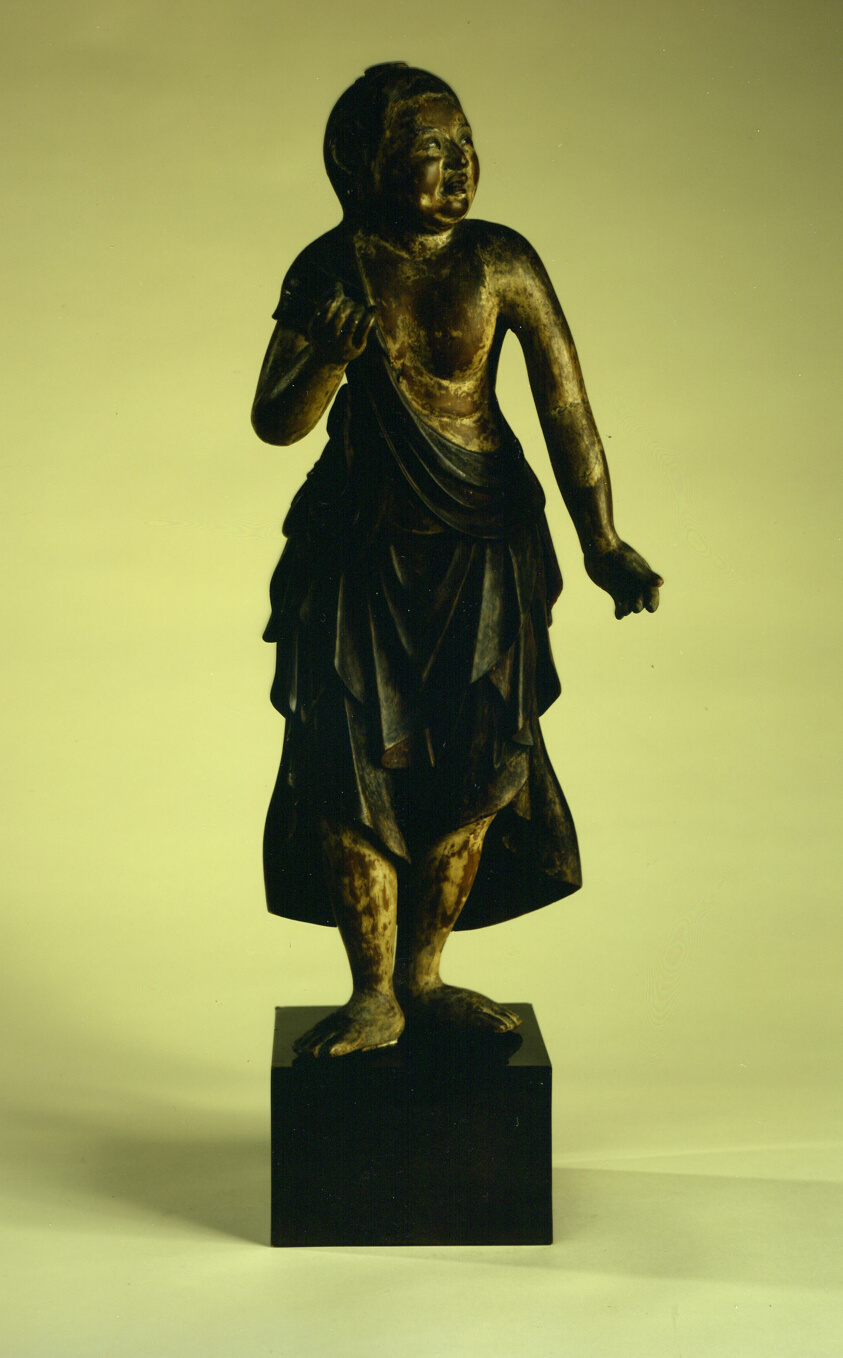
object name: Sculpture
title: Seitaka Dôji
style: Japanese (culture or style)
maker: Japan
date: 13th century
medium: Wood with traces of polychromy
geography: Japan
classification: wood; sculpture; asian art